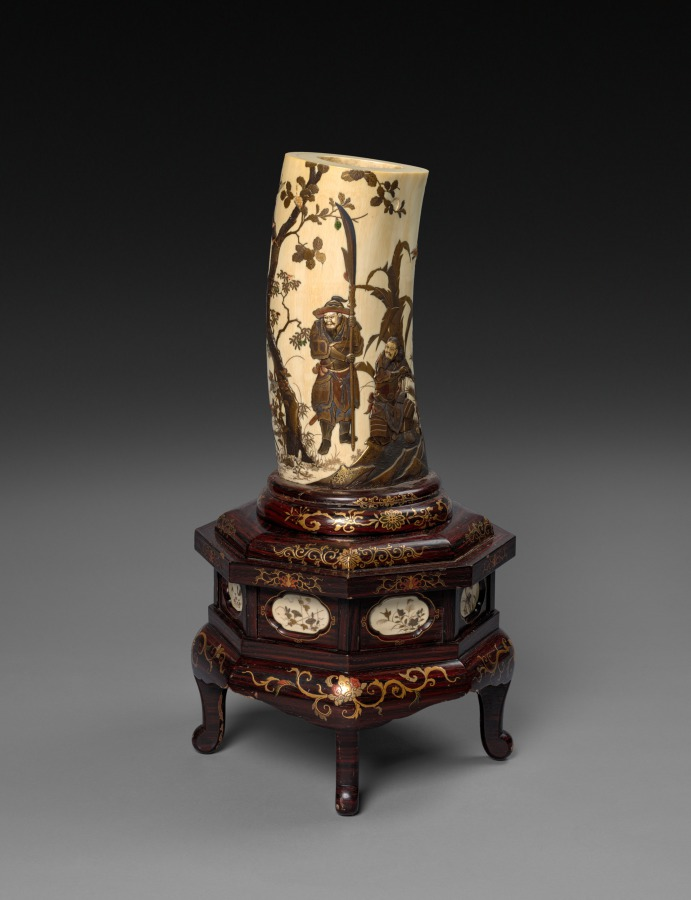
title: Ivory Tusk Vase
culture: Japan, Meiji period (1868–1912)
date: late 1800s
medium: carved ivory, pigment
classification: Ivory